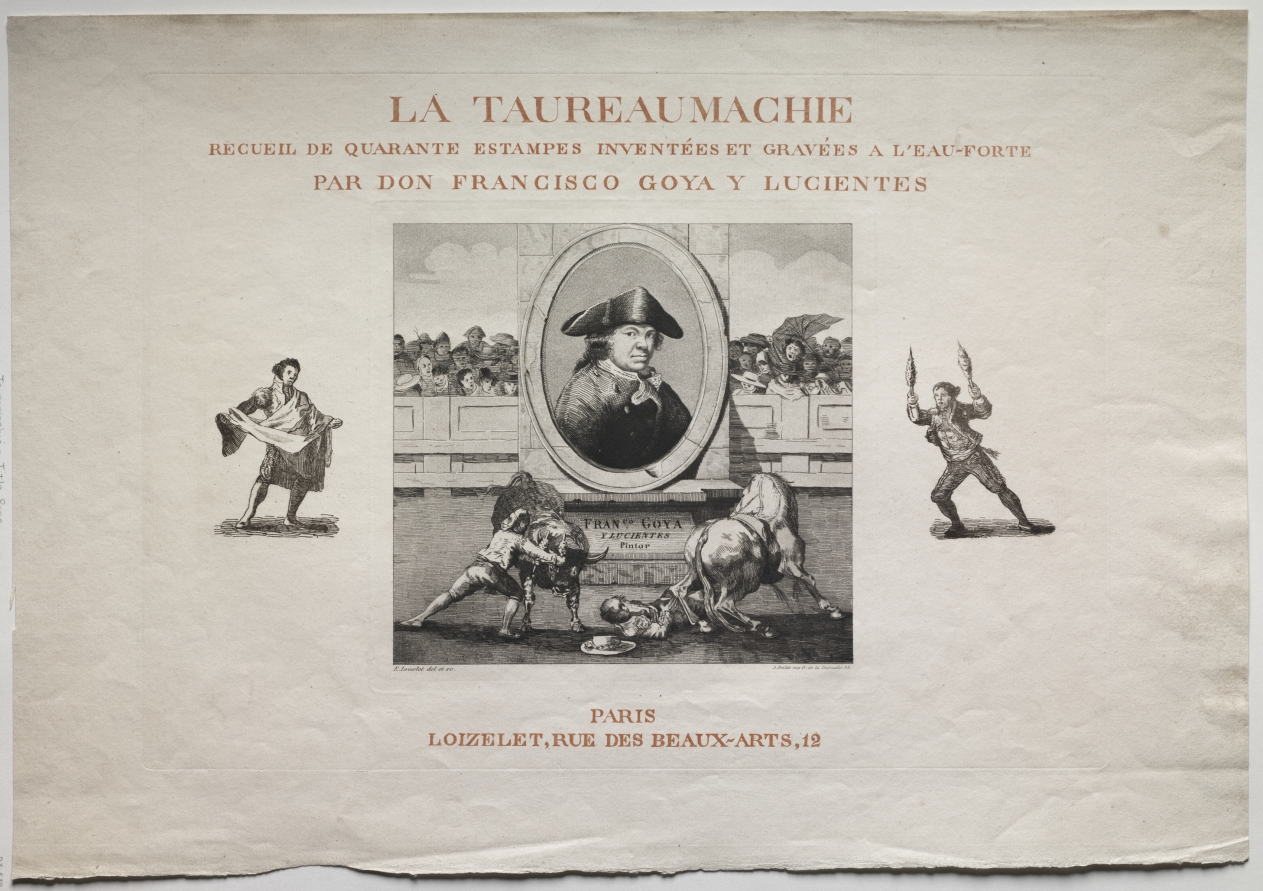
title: Bullfights: Title Page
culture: Spain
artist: Francisco de Goya (Spanish, 1746–1828)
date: 1816, printed 1876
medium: engraving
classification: Print